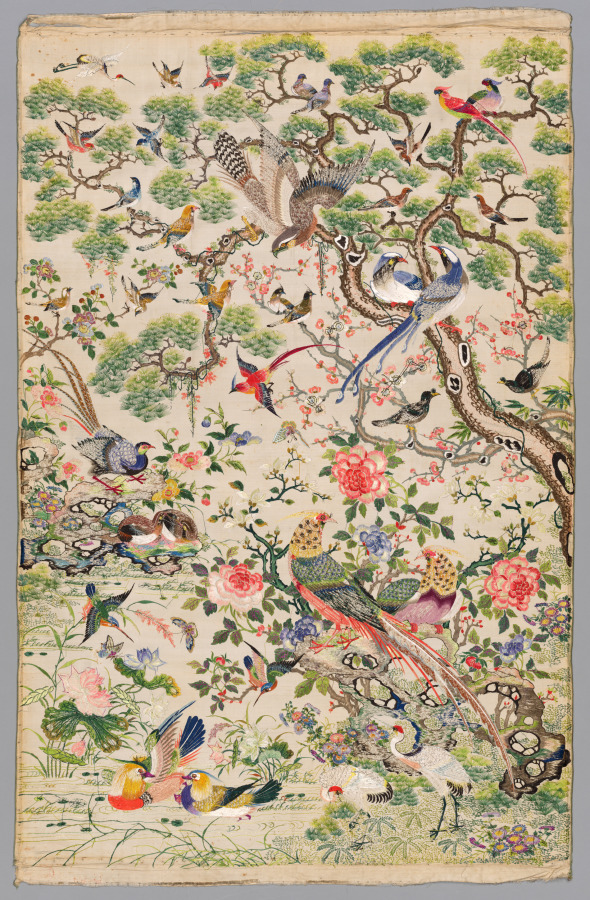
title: A Myriad of Birds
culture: China, Qing dynasty (1644–1911)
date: 1700s–1800s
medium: silk: satin weave with polychrome silk embroidery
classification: Embroidery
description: This embroidered panel, made with extremely fine silk threads, presents a lavishly detailed composition filled with fortuitous imagery. Pairs of birds, including mandarin ducks, peacocks, cranes, swallows, and pheasants, move among flowering trees, ornamental rocks, and aquatic plants, symbolizing harmony, prosperity, and longevity. Cranes stand for longevity, while a pair of mandarin ducks convey wishes for a harmonious marriage. Inspired by the decorative bird-and-flower paintings of the artist Lü Ji, the work prioritizes symbolism over spatial logic. With vibrant colors, meticulous stitching, and fortuitous meaning, the embroidery exemplifies the technical brilliance of Qing dynasty textile art, rivaling the quality of imperial production.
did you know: This magnificent textile, probably executed by a woman, demonstrates the tradition of making embroidered pictures in imitation of paintings.